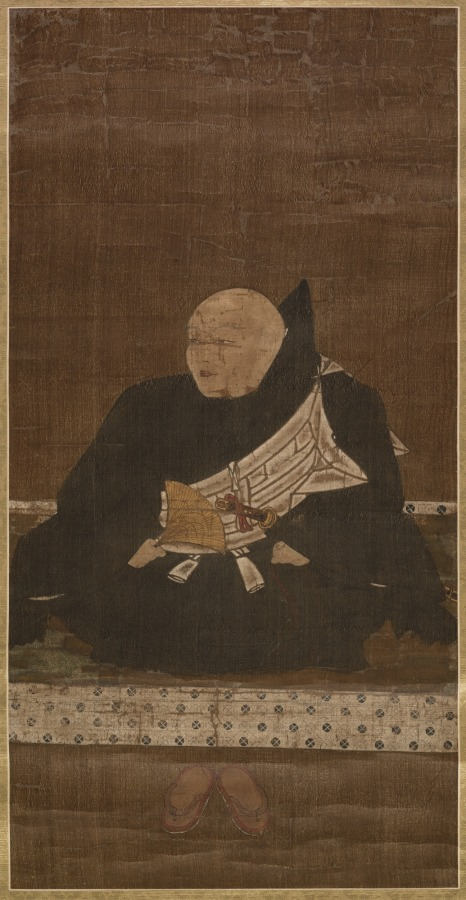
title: A High-ranking Noble in Priest's Robe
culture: Japan, Muromachi period (1392–1573)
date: 1392–1573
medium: hanging scroll; ink and color on silk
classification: Painting